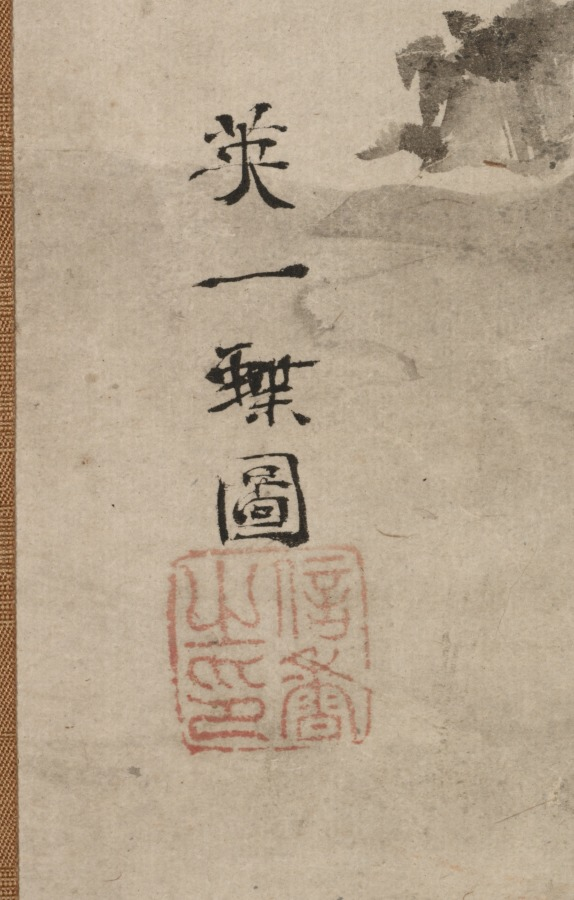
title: Daoist Immortal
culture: Japan, Edo period (1615–1868)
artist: Hanabusa Itchō (Japanese, 1652–1724)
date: 1615–1868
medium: hanging scroll, ink and color on paper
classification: Painting